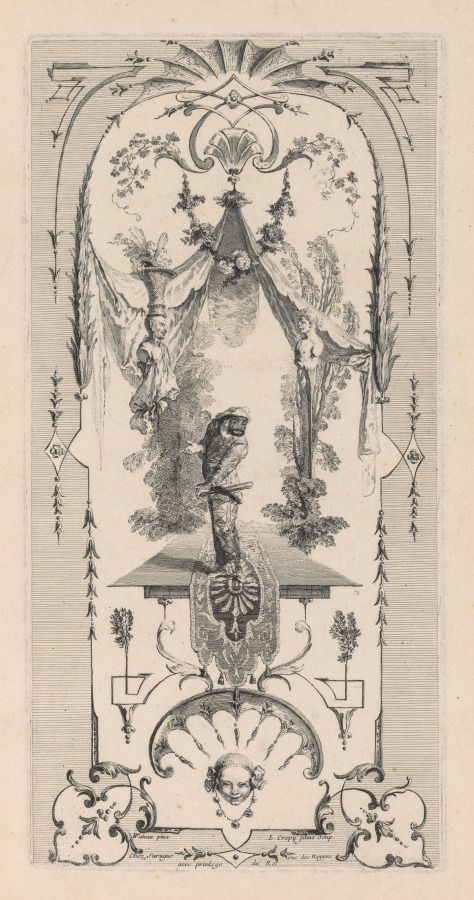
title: Harlequin, Arabesque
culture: France, 18th century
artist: Louis Crépy (French)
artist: after Jean-Antoine Watteau (French, 1684–1721)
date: early 1700s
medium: engraving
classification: Print